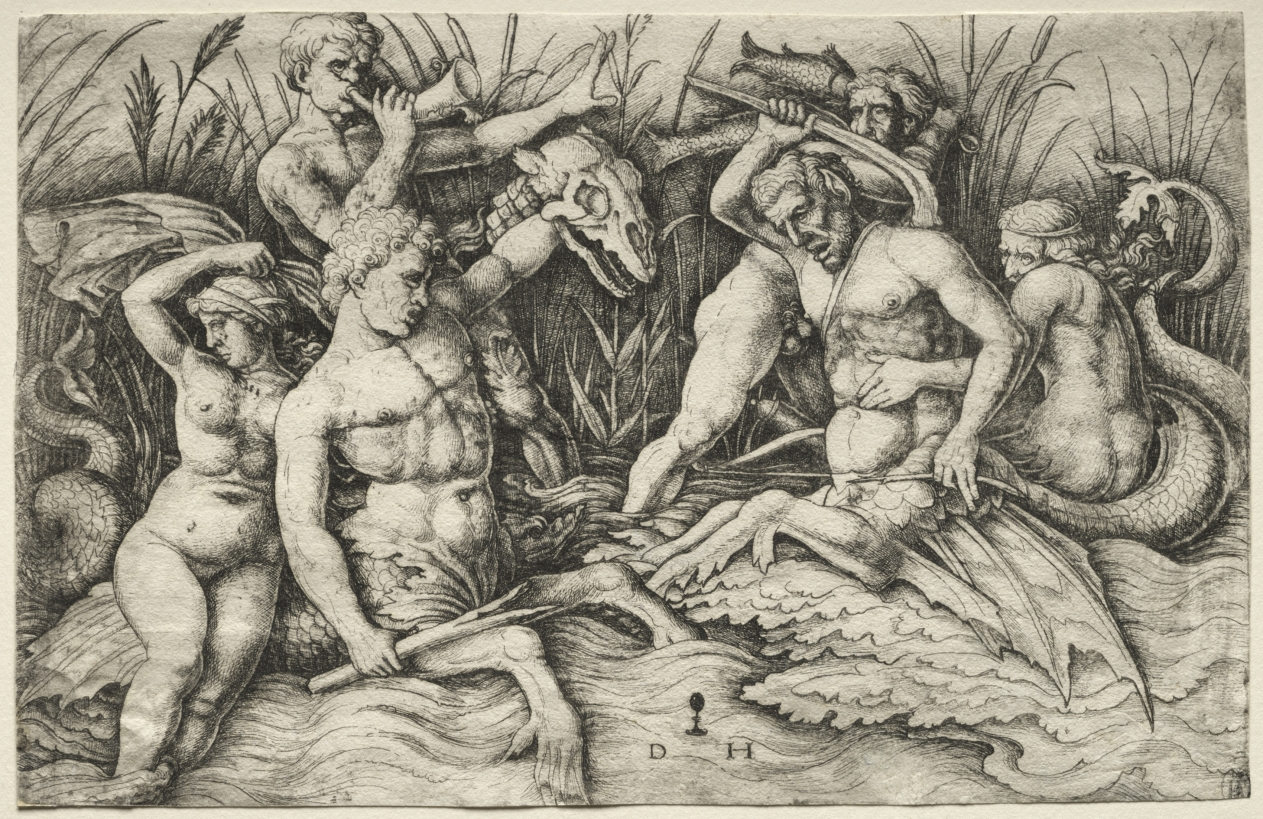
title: Two Tritons fighting - Battle of the Sea Gods (right portion)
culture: Germany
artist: Daniel Hopfer (German, c. 1470–1536)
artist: copy after Andrea Mantegna (Italian, about 1431–1506)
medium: etching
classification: Print